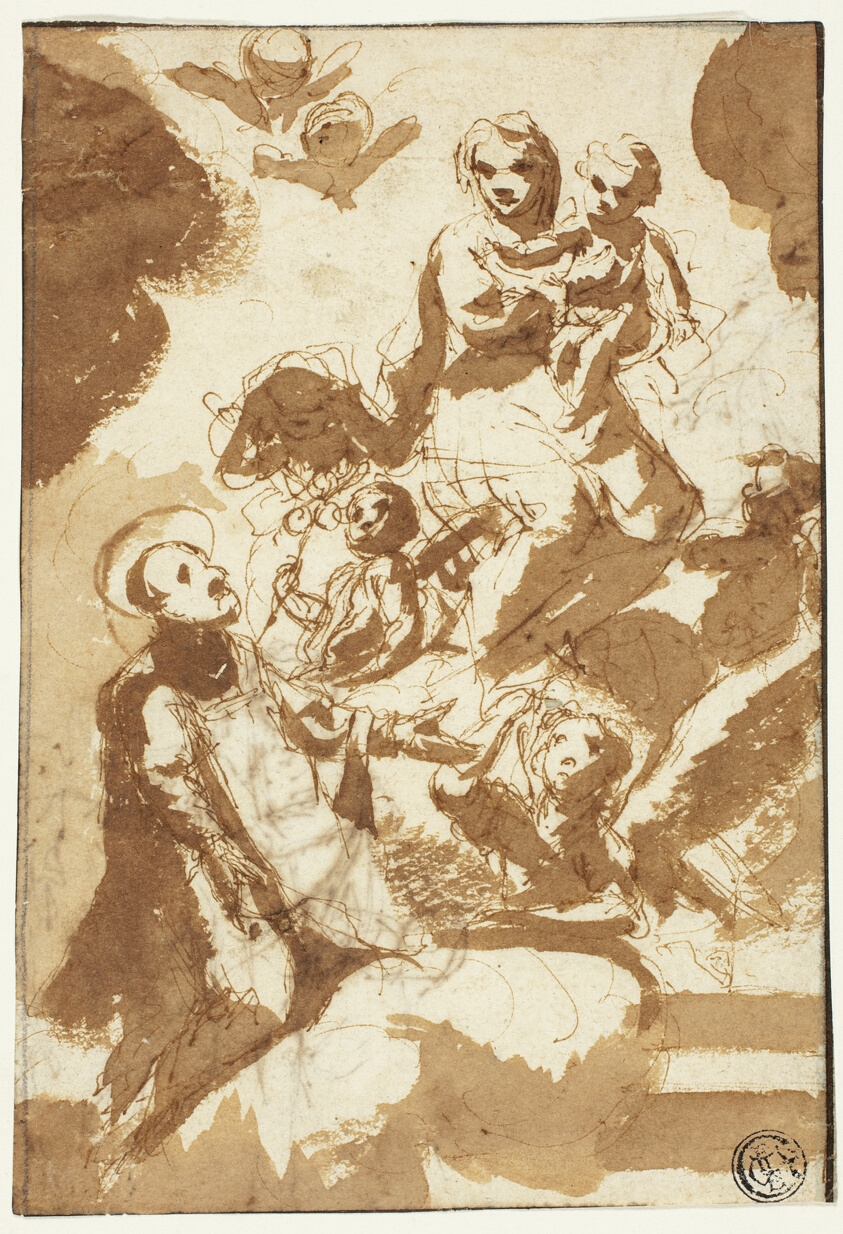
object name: Drawing and Watercolor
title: Virgin and Child on Clouds with Kneeling Male Saint (recto); Sketch of Two Female Figures (verso)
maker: Unknown Italian Artist; Bolognese, 1600-1699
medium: Pen and brown ink with brush and brown wash on ivory wove paper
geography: Italy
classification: drawings (visual works); prints and drawing